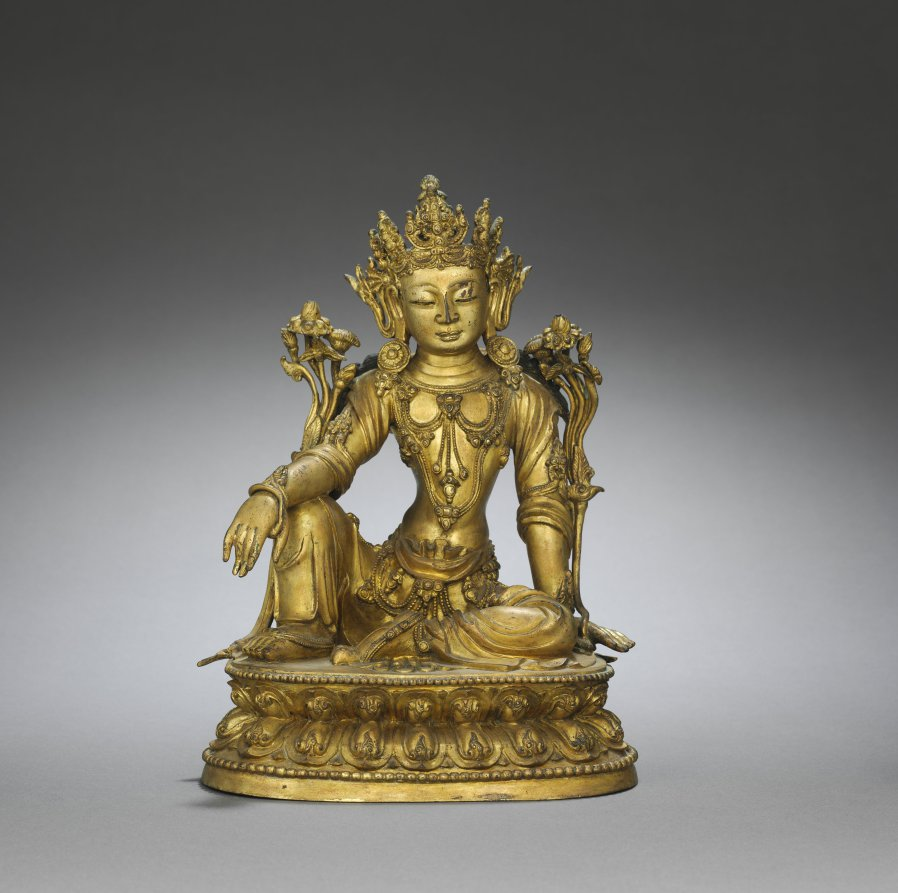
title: Seated Guanyin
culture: China, Ming dynasty (1368–1644)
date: c. 1450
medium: gilt bronze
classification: Sculpture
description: A heavily jeweled Guanyin sits in the posture of royal ease on a double-lotus throne. Also known as Avalokitesvara or the Bodhisattava of Compassion, Guanyin postponed achieving enlightenment in order to assist all who cry out for help. This made Guanyin a very popular devotional figure for Buddhists. This gilt bronze's size suggests that it could have been placed on a private altar or shrine for personal devotion.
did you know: There are clusters of blossoming lotuses by the figure's shoulders.